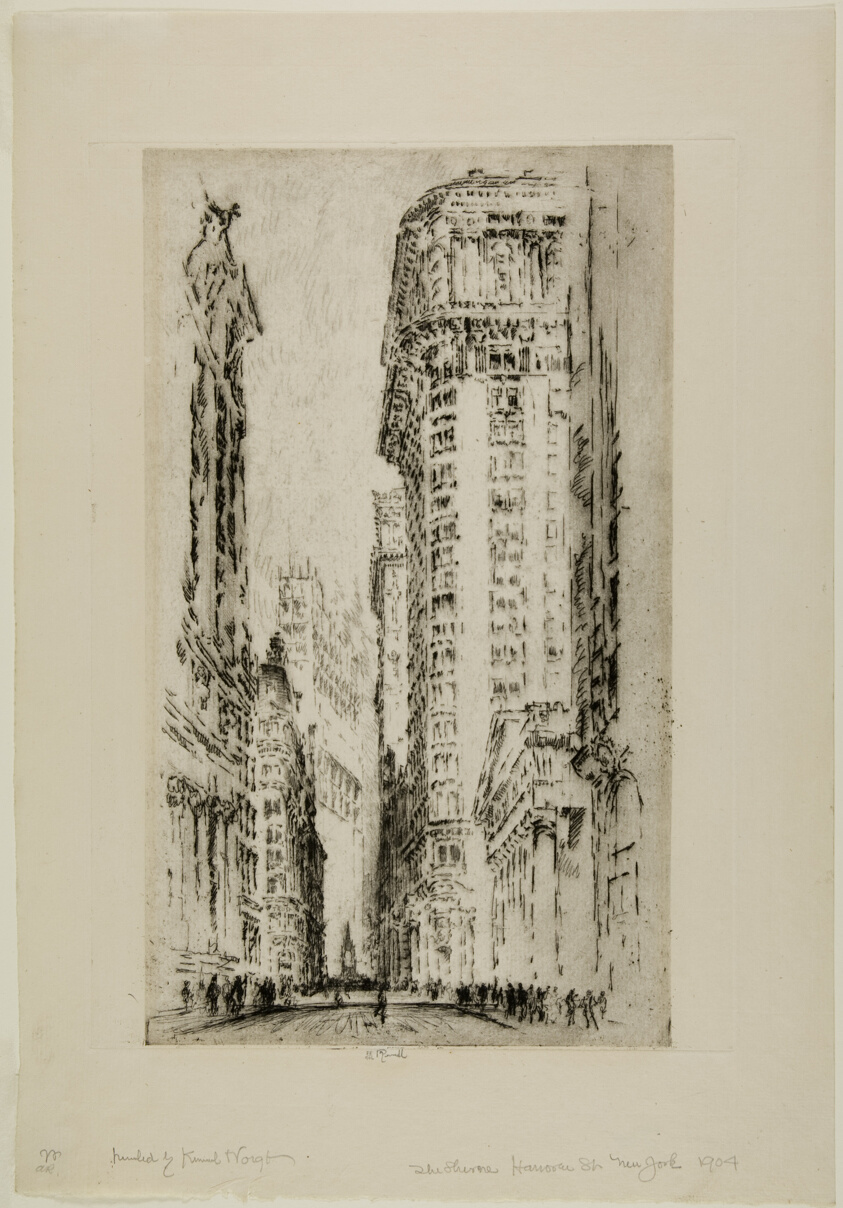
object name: Print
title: The Shrine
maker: Joseph Pennell (American, 1857-1926)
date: 1904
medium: Etching and drypoint on cream laid paper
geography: United States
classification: etching; drypoint; print; prints and drawing